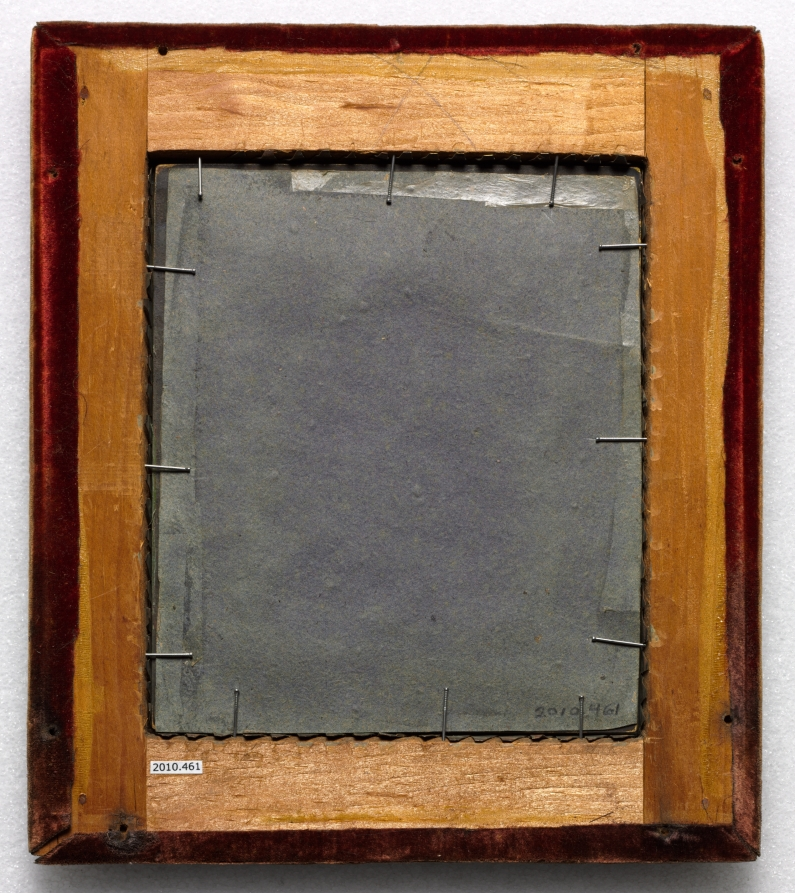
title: Portrait of Anne Law (née Towry), 1st Lady Ellenborough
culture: England, 19th century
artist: John Linnell (British, 1792–1882)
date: c. 1821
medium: watercolor on ivory heightened with gum arabic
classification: Portrait Miniature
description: John Linnell was born and lived much of his young adulthood in Bloomsbury, where his father, James, made picture frames and restored paintings. As a boy the artist trained briefly with Benjamin West (1738–1820) and John Varley (1778–1842) before becoming a student at the Royal Academy from 1805 to 1812. Though primarily known for his landscapes, Linnell was also a prolific portraitist and executed miniatures during the first two decades of his career, learning the medium from his neighbor James Holmes (1770–1860). According to an early biographer, Linnell began painting miniatures around 1818 with a portrait of his wife. By 1823 he had executed a number of miniature commissions from aristocratic patrons, including Princess Sophia, facilitated by the praise of the society maven Lady Stafford. He painted his last known miniature on ivory in 1832. During the approximately fifteen years that the artist painted miniatures, he consistently charged between 10 and 50 guineas for a portrait. These fees corresponded less to the size of the ivory than to the degree of finish and elaboration of the composition. In this portrait Anne Law (née Towry), 1st Lady Ellenborough (c. 1769–1843), is depicted half length. She wears a high-waisted white dress of translucent fabric through which a hint of blue appears and around which she wears a black belt. A devant de corsage (stomacher, or bodice brooch) is worn at her décolletage, extending to the belt. Its gold framework contains at least twelve semiprecious stones colored blue, red, aquamarine, pink, and brown. A gold brooch with a large blue stone is pinned to the cloak at her right shoulder. She also wears a twisted multistrand pearl necklace, matching pearl pendant earrings, and two gold rings on her left ring finger. A dark gray-green shawl with red reverse, gold border, and red fringe is draped over her shoulders and arms. She holds a closed fan in her left hand and stands against a brown background featuring a green and auburn striped curtain in the upper left corner. The sitter’s fair hair is dressed in ringlets that fall at her neck. The miniature is housed in a standing gilt metal and red velvet frame that dates from the same period.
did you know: Lady Ellenborough was described as “so exceedingly lovely, that passengers would linger to watch her watering the flowers—such was the fashion of the day—on the balcony of their house in Bloomsbury Square.”